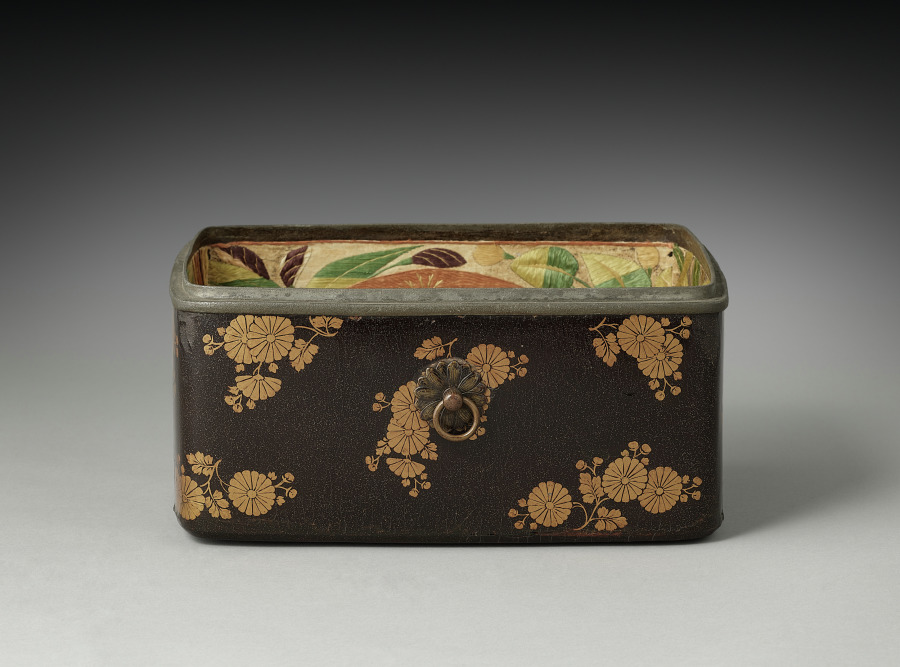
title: Cosmetics Box with Chrysanthemums (base)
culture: Japan, Kamakura period (1185–1333)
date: early 1300s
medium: lacquer on wood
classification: Lacquer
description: In China, the chrysanthemum was historically appreciated for its association with the Double Nine Festival and the reclusive life of the poet Tao Yuanming (AD 365-427). In Japan, the 16-petaled chrysanthemum came to symbolize the Japanese imperial family after Emperor Gotoba (1180-1239) chose the motif as his personal emblem, having it applied to his sword and everyday utensils. This box proves that the flower also appeared on lacquer wares as early as the Kamakura period.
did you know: In Japanese, this type of small box is called a tebako, literally a hand box, and was typically part of a cosmetics set.